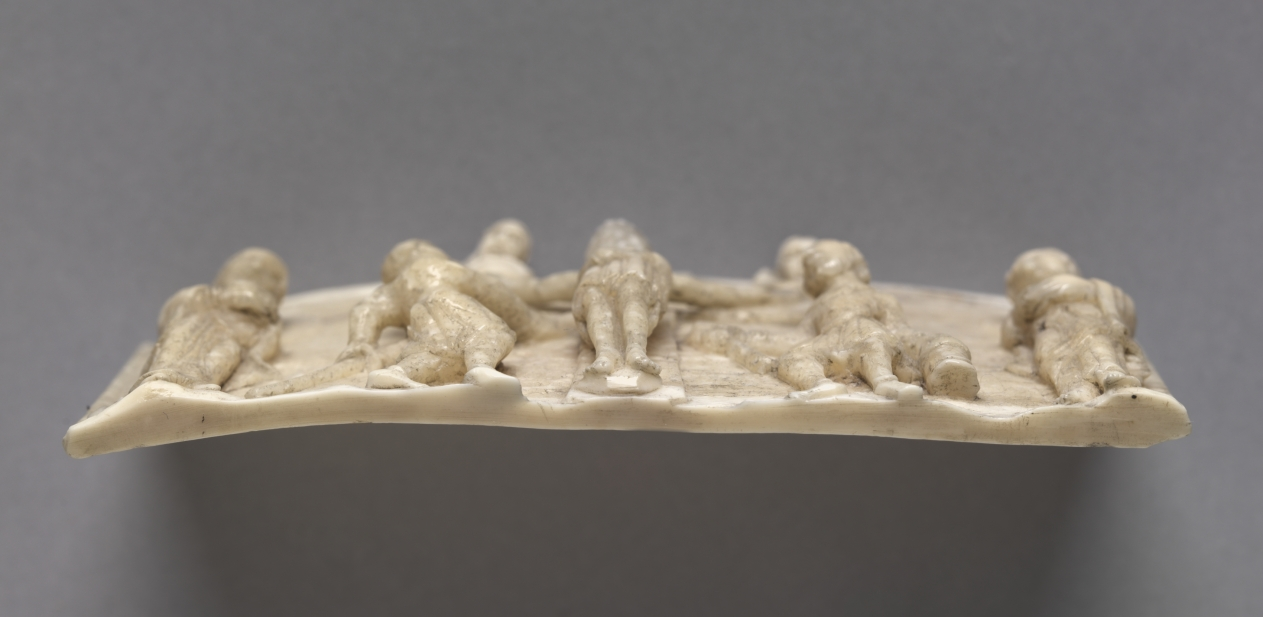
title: Plaque from a Portable Altar Showing the Crucifixion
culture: Germany, Lower Rhine Valley, Romanesque period, 11th century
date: 1050–1100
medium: walrus ivory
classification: Ivory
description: These intricately carved ivory panels once decorated the sides of a portable altar. Three of the plaques, those depicting Christ in Majesty and his apostles, were the first major acquisition of William M. Milliken, the museum's first curator of decorative arts and later director (1930–58). They were purchased from Emile Rey, the New York partner of Arnold Seligmann, Rey and Company, who had been closely associated with J. P. Morgan, Henry Walters, and other important American collectors. The fourth plaque, depicting the Crucifixion, was donated by Arnold Seligmann, Rey and Company later the same year. As Milliken later recalled, the pieces Rey showed him "were immensely intriguing, monumental in scale, even if tiny in size, the Christ in the Mandorla could have been enlarged and would have graced the tympanum of a great cathedral. . . . These morse [that is, walrus] ivories overwhelmed me . . . Somehow they must come to Cleveland. How was the question. Yet they would and must."